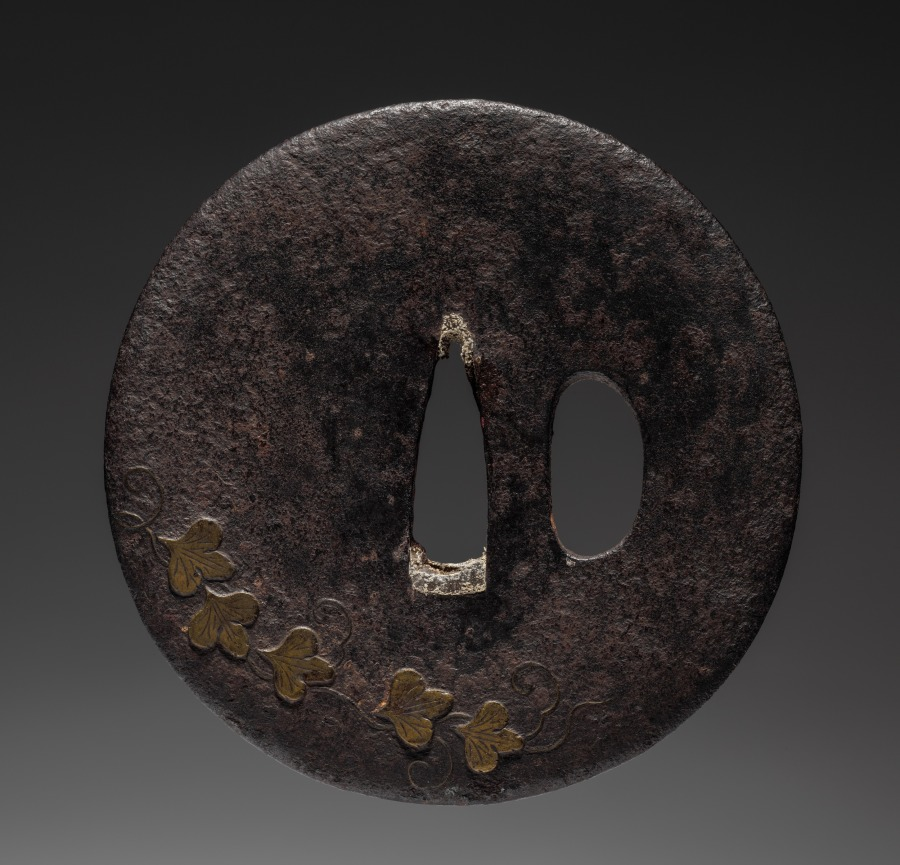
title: Sword Guard (Tsuba) with Gourds on Vine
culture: Japan, possibly Edo period (1615-1868)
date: c. 1615–1868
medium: iron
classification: Arms and Armor